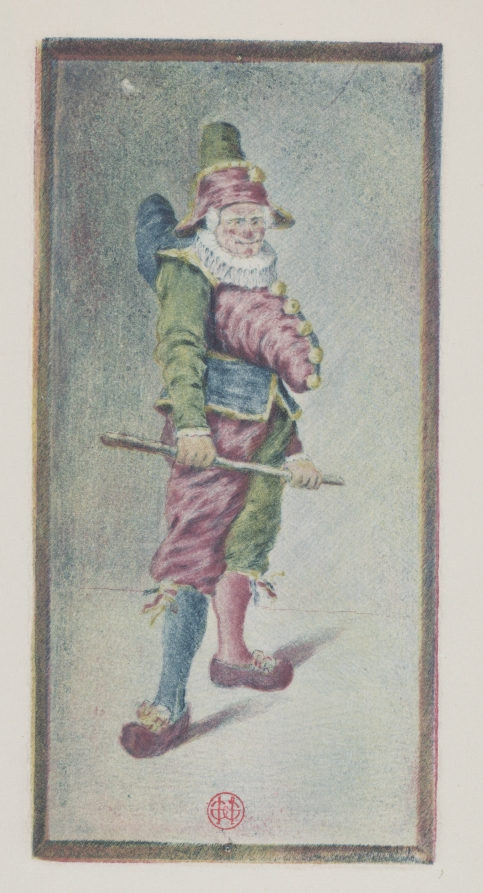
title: Punchinello, Three-quarters to the Right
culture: France, 19th century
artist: Henri Charles Guérard (French, 1846–1897)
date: c. 1887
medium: color etching, aquatint and roulette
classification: Print